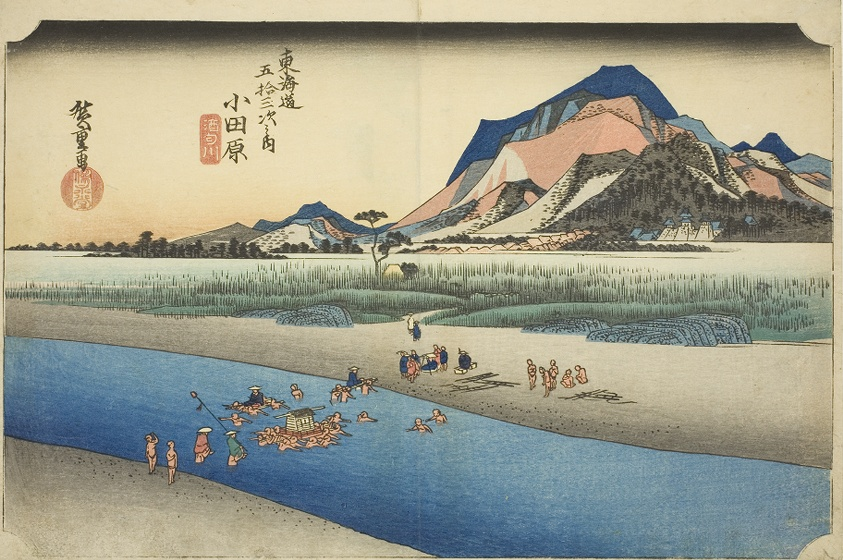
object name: Print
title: Odawara: The Sakawa River (Odawara, Sakawagawa), from the series "Fifty-three Stations of the Tokaido Road (Tokaido gojusan tsugi no uchi)," also known as the Hoeido Tokaido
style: Japanese (culture or style)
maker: Utagawa Hiroshige 歌川 広重; Japanese, 1797-1858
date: c. 1833/34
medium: Color woodblock print; oban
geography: Japan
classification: woodblock print; print; asian art